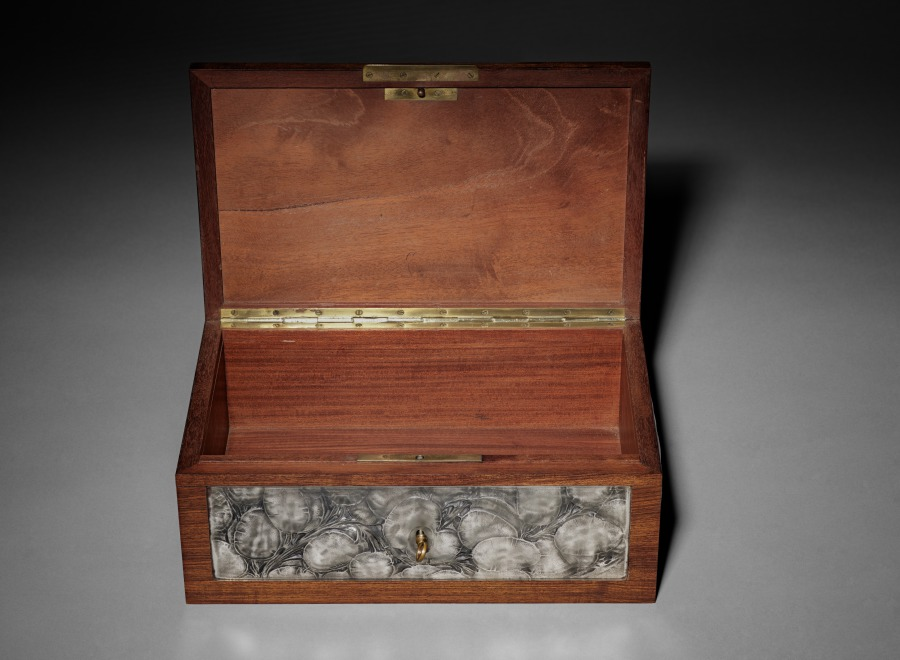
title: Monnaie du Pape Coffer (coffret)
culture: France, 20th century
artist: René Lalique (French, 1860–1945)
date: c. 1914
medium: wood, bombé glass panels with gray patina, metal key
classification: Mixed Media